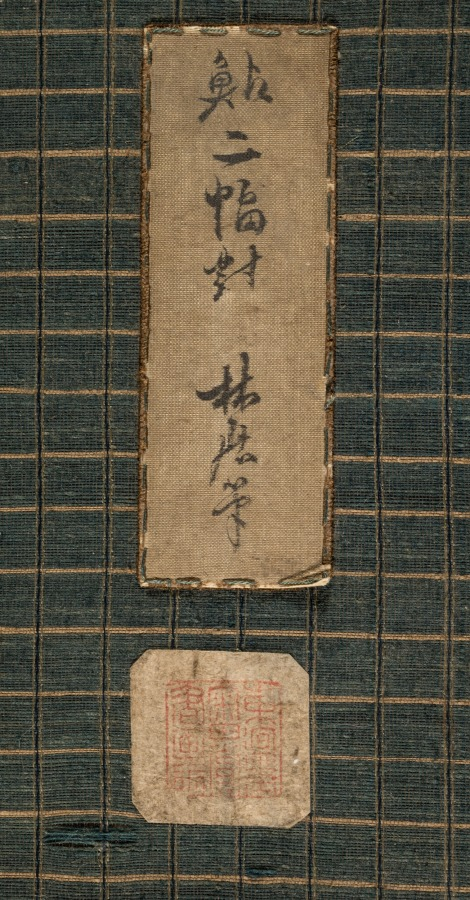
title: Fish and Rock; Fish and Seaweed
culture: Japan, Momoyama period (1573–1615)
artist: Rinkyo (Japanese)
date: 1573–1615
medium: pair of hanging scrolls; ink on paper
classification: Painting